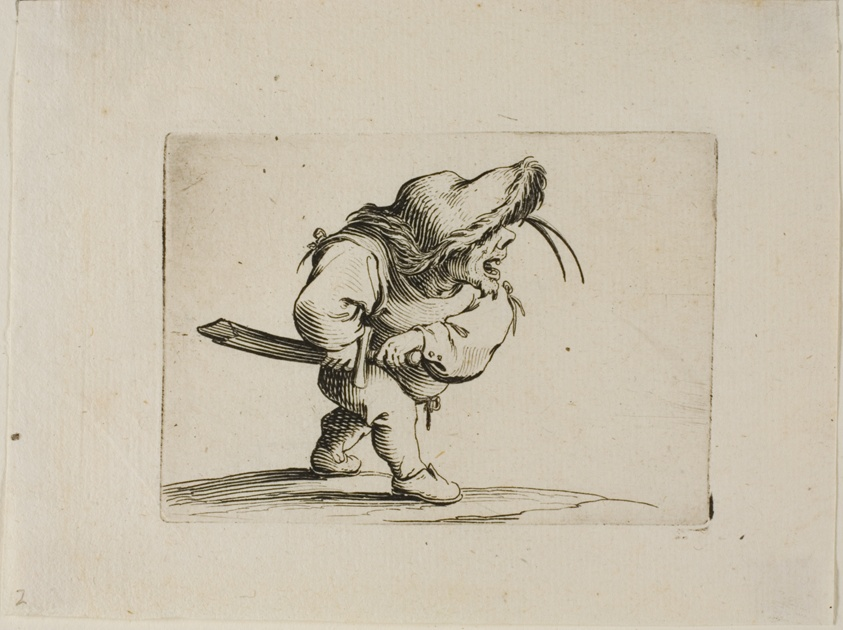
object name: Print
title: Man Preparing to Draw his Sword, from Varie Figure Gobbi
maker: Jacques Callot (French, 1592-1635)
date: 1616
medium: Etching on paper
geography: France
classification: etching; print; prints and drawing